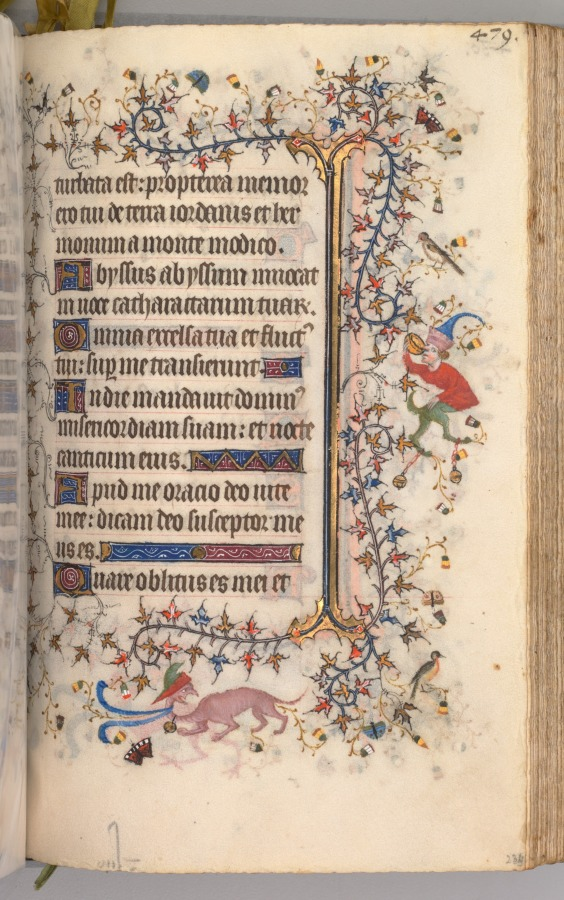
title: Hours of Charles the Noble, King of Navarre (1361-1425): fol. 234r, Text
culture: France, Paris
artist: Master of the Brussels Initials and Associates (French)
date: c. 1405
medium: ink, tempera, and gold on vellum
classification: Bound Volume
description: This precious volume was obviously highly prized by its owner, the French-born King of Navarre, who had his coat of arms painted on no less than twenty folios. Rather than directly commissioning this manuscript from a specific workshop, it seems that Charles the Noble acquired his book of hours -- perhaps ready-made for the luxury market -- while on a trip to Paris in 1404-05. A collaborative effort, six painting styles are evidenced within the pages of this codex, those of two Italians, two Frenchmen, and two Netherlanders. The painter who was responsible for the planning and decoration of the book, and who produced seventeen of the large miniatures, was a Bolognese artist known as the Master of the Brussels Initials. His principal assistant, responsible for most of the borders, was a Florentine who signed his name "Zecho" da Firenze on folio 208 verso.